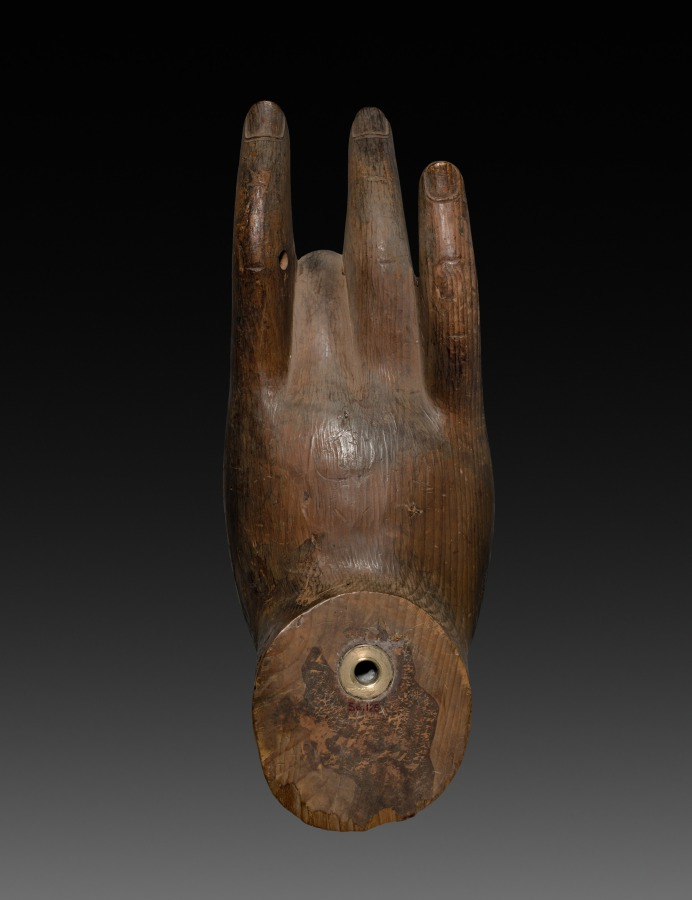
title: Hand of Buddha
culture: Japan, Nara period (710–94)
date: late 700s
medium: wood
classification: Sculpture